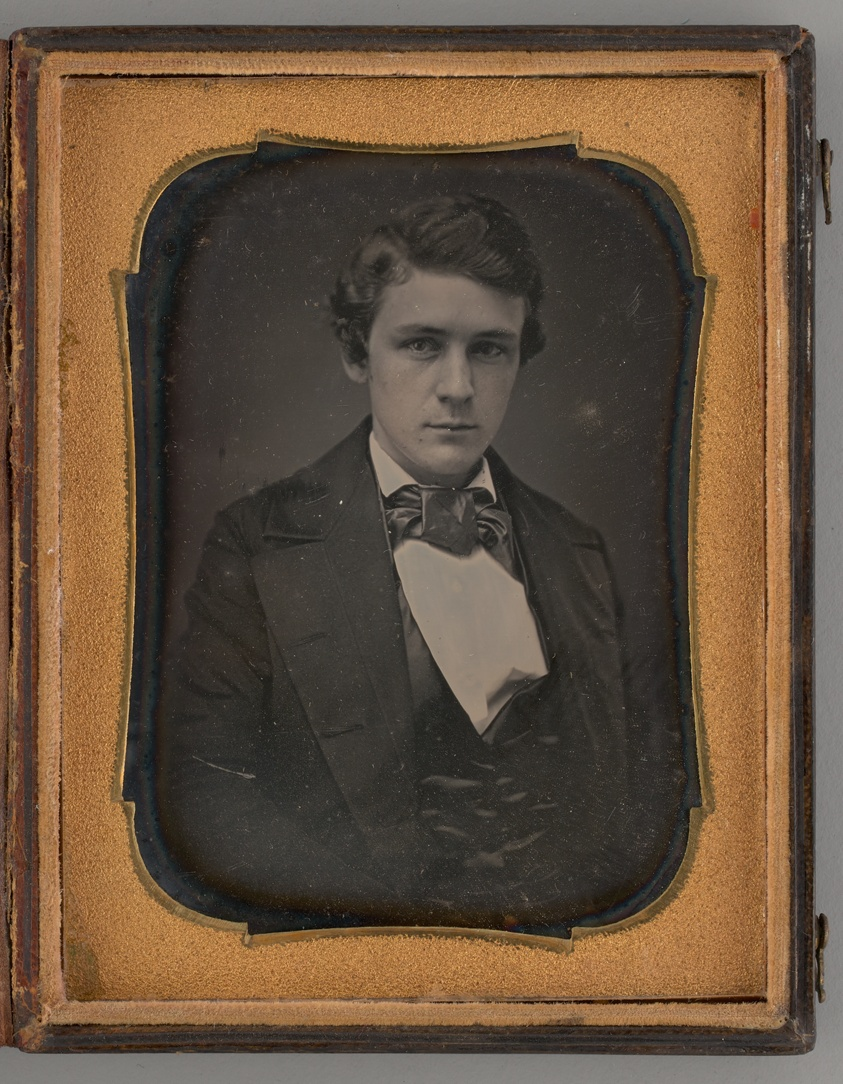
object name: Photograph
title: Untitled (Portrait of a Man)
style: 19th century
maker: Unknown maker; American, 19th century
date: 1848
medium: Daguerreotype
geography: United States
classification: portrait; photograph; photographic process; photography; portrait; daguerreotype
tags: lundberg collection, portraits, portraits: male subject